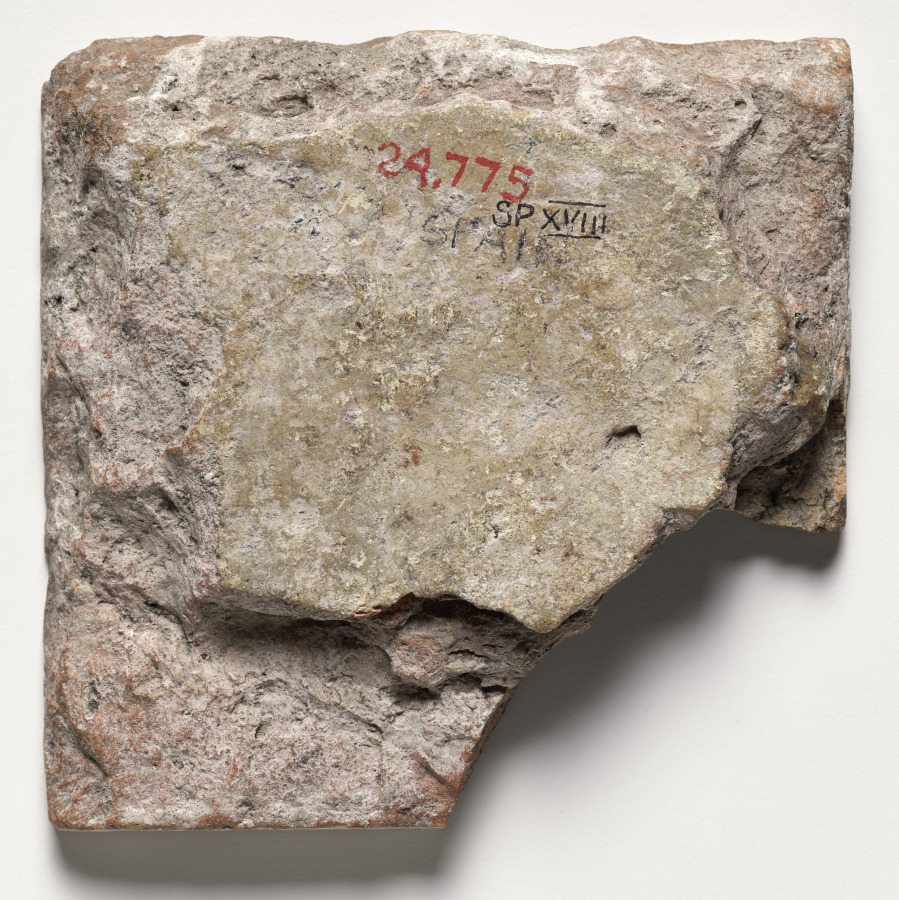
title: Tile–Foliated Scrolls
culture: Spain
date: c. 1700s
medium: glazed ceramic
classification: Ceramic